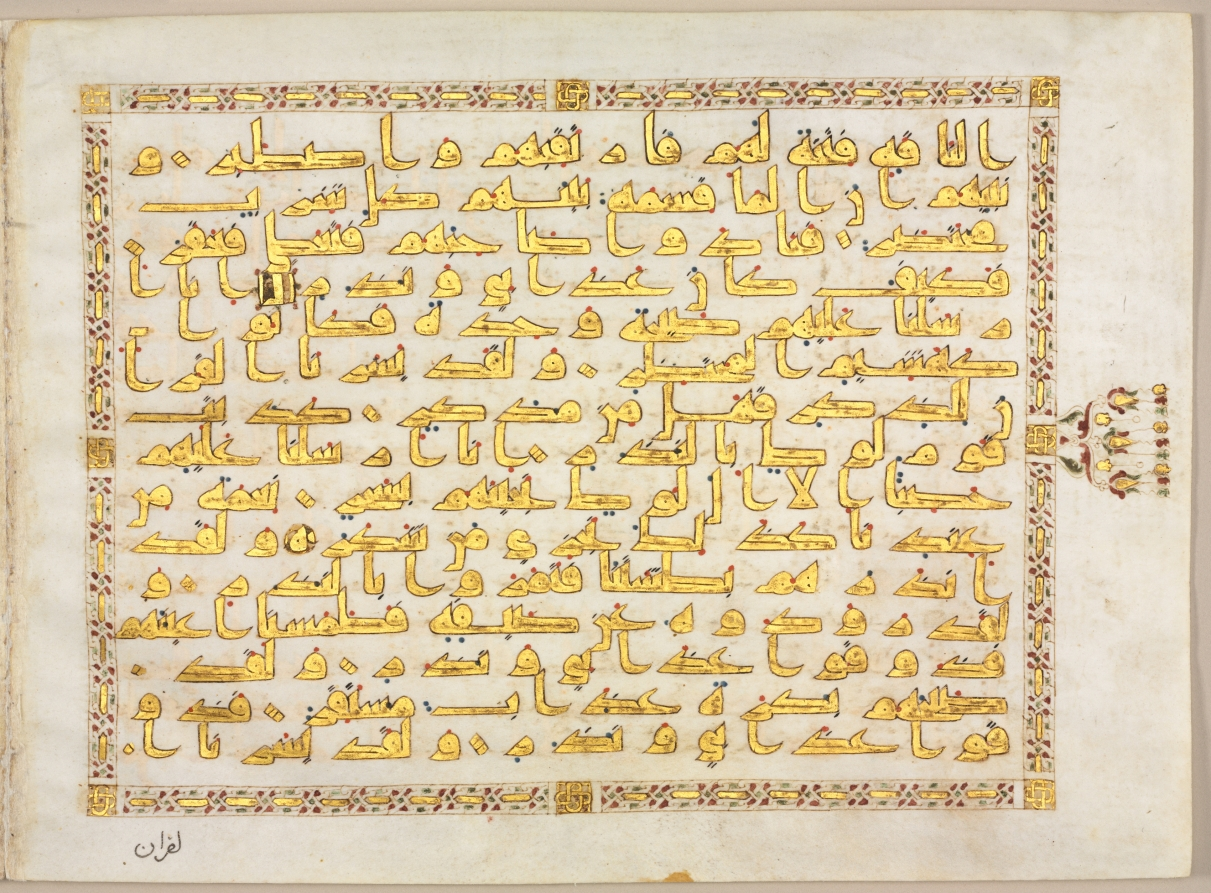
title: Qur'an Manuscript Folio (verso); Left side of Bifolio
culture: North Africa, Aghlabid or Abbasid Period, 9th century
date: 800s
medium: gold, ink and colors on parchment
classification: Manuscript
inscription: Sura al-Qamar (54: part 27-part 40). Kufi (fifteen lines to a page)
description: Because of its connection with the Qur'an, calligraphy was elevated above all other art forms in the Islamic world. From an awkward and nearly illegible form of writing, Arabic script was transformed during the 600s and 700s to make it worthy of recording the Divine word. By the 800s, Muslim scribes were producing copies of the Qur'an that were true calligraphic masterpieces. This Qur'an, written entirely in gold, exemplifies the angular form of writing known as Kufic at its majestic best. The text on the right page is the opening of the Chapter of the Star (53:1–21), which begins: “By the star when it plunges, your comrade is not astray, neither errs, nor speaks he out of caprice. This is naught but a revelation revealed, taught him by one terrible in power, very strong. . . . ”